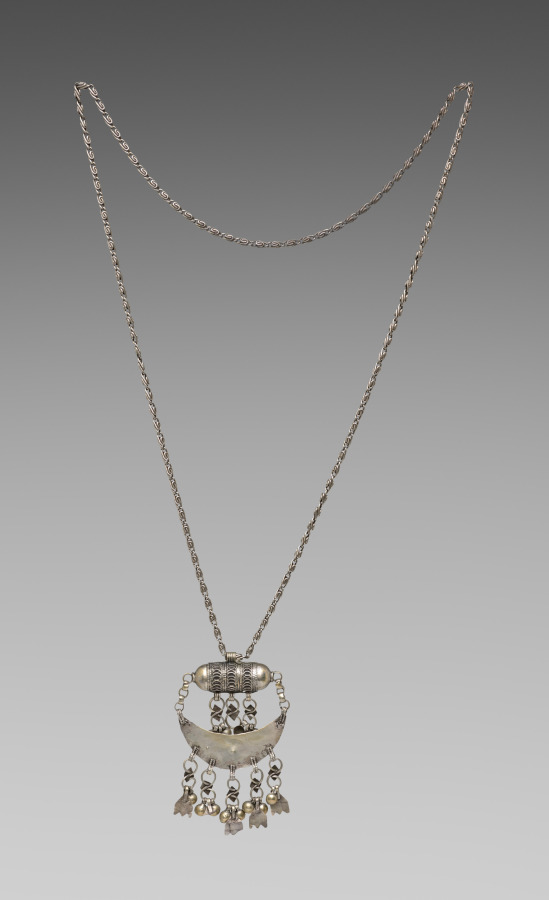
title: Necklace with pendant (waqari or wakari?)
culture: East Africa, probably Harar, Ethiopia, unknown silversmith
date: likely early to mid-1900s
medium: silver alloy, glass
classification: Jewelry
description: Ornate filigree jewelry was historically made in Ethiopia for royals and nobility by specialized silversmiths trained through long apprenticeships. This elaborate pendant necklace (waqari) probably made and worn in the Muslim city of Harar. Muslim women wore such massive jewelry, which holds aesthetic links to nearby Yemen. Its half-moon pendant is a protective crescent shape and its upper filigreed capsule is an amulet. The crescent symbol has existed as a talismanic form in Ethiopia since the Aksumite Empire (1–700s CE).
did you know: Silversmiths also made objects for religious and royal use, like crowns and crosses.